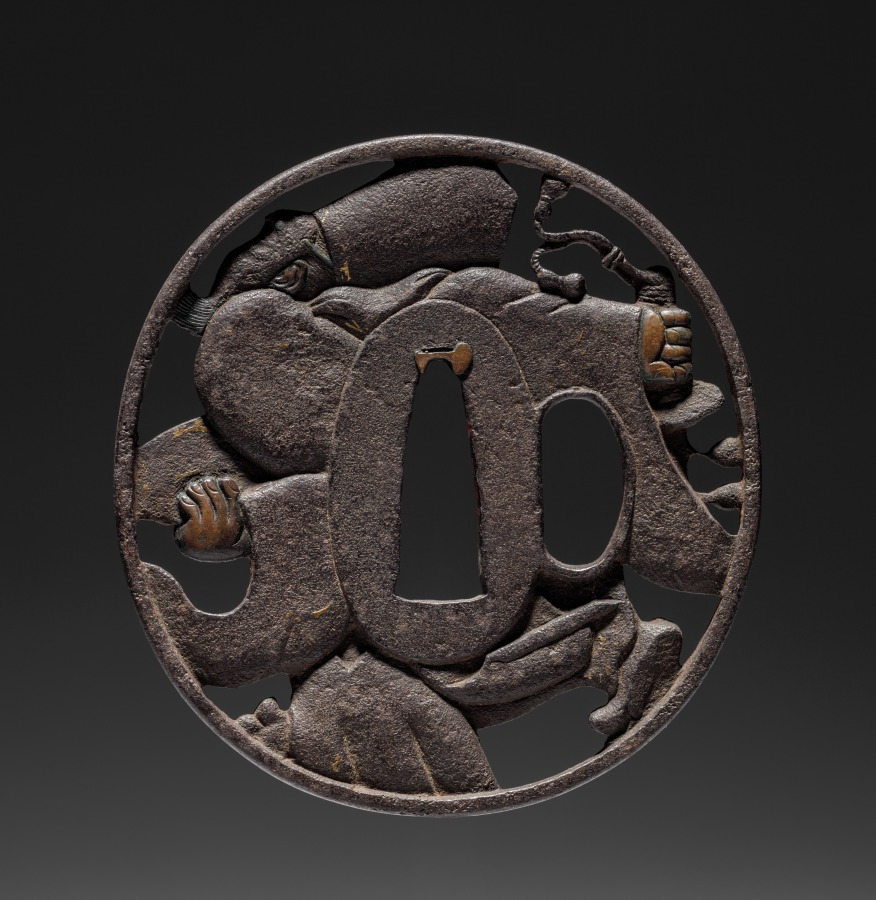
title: Sword Guard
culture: Japan, possibly Edo period (1615-1868)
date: c. 1615–1868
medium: iron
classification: Arms and Armor